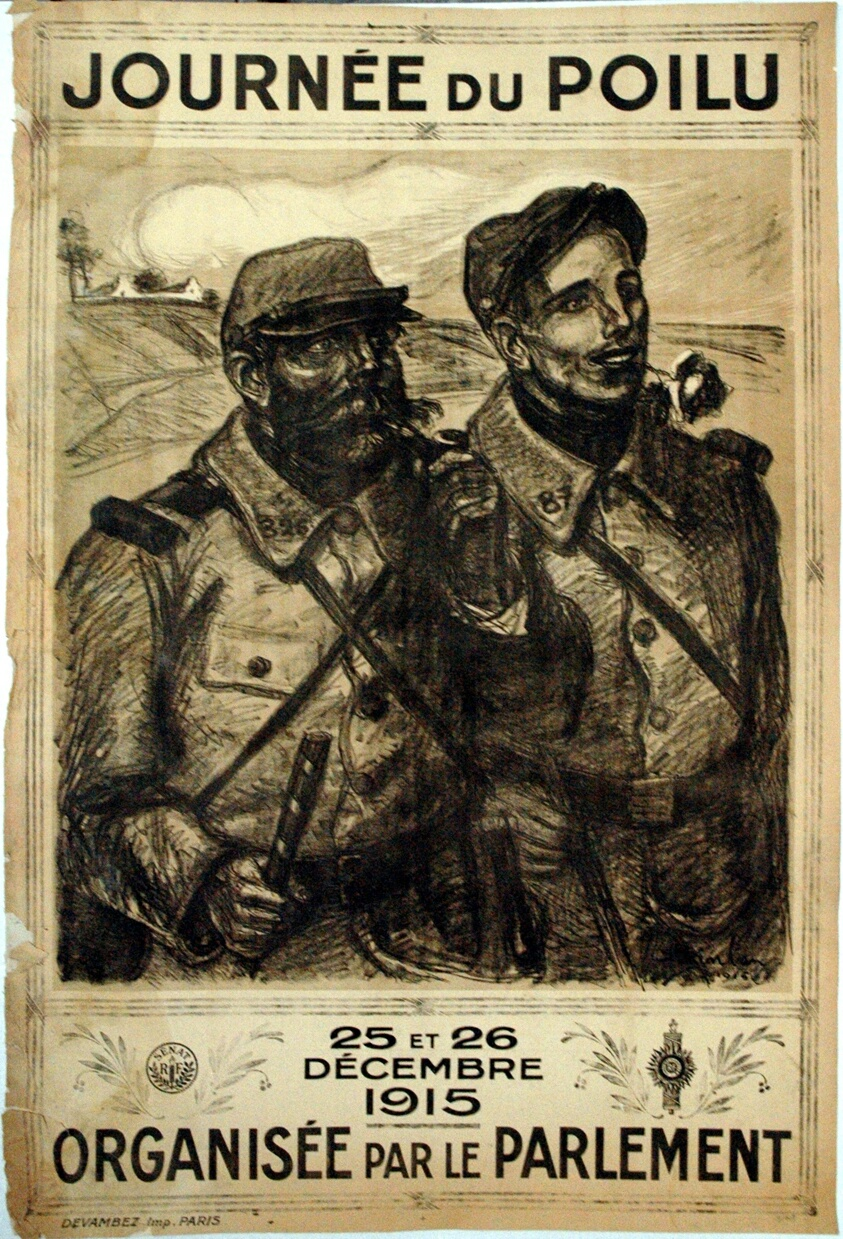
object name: Print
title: The Day of the Doughboy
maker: Théophile-Alexandre Steinlen, French, born Switzerland, 1859-1923; Printed by Imprimerie Devambez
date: 1915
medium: Color lithograph on cream wove paper laid down on linen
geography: France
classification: poster; print; prints and drawing